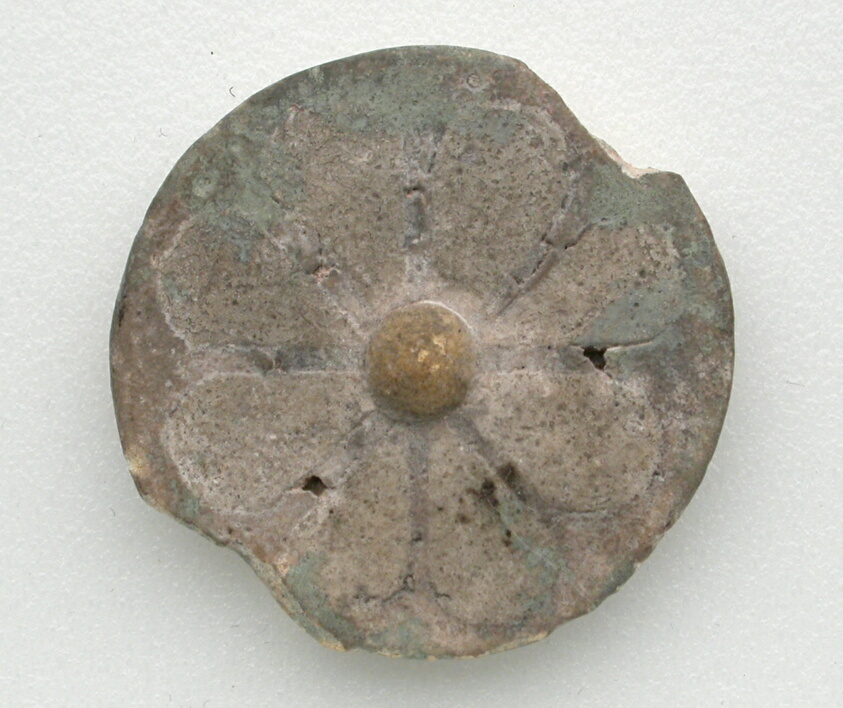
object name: Decorative Arts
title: Rosette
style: new kingdom, egyptian, ancient, ramesside period, twentieth dynasty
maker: Egyptian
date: New Kingdom, Dynasty 20 (about 1186–1069 BCE)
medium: Faience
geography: Egypt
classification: inlay; ceramics; ancient art; decorative arts; faïence (composite material)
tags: flowers